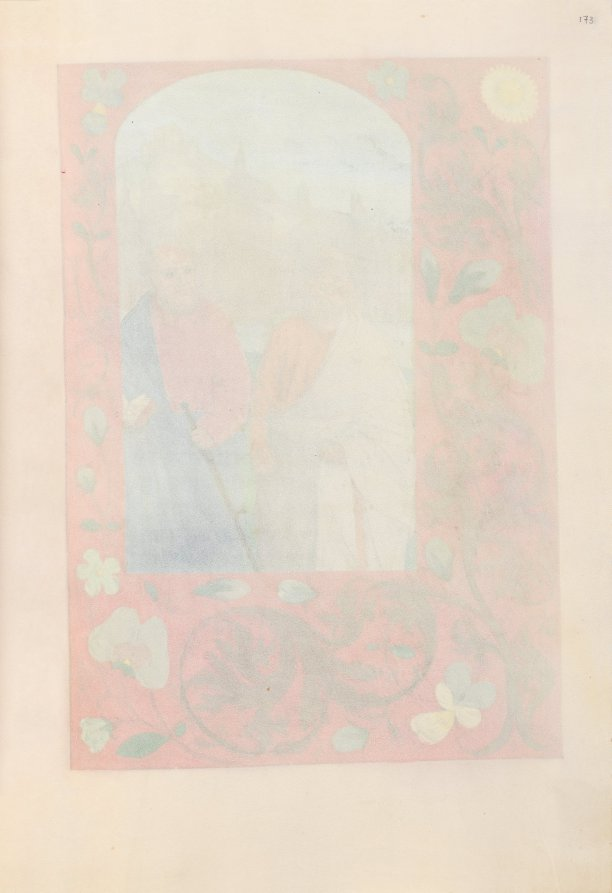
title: Hours of Queen Isabella the Catholic, Queen of Spain: Fol. 173r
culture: Flanders, Ghent and Bruges, late 15th century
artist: Master of the First Prayerbook of Maximillian (Flemish, c. 1444–1519)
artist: and Associates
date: c. 1500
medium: ink, tempera, and gold on vellum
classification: Bound Volume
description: This manuscript was illuminated by a circle of at least five highly organized manuscript painters active in the Flemish cities of Ghent and Bruges. The principal illuminator was Alexander Bening, who painted the majority of the book's miniatures. Manuscripts produced by this circle of artists are renowned for the decoration of their borders, which typically feature a rich variety of realistically-painted flowers, birds, and butterflies. This prayer book, called a book of hours, was intended not for a cleric, but for the private devotions of a lay person-in this case, Isabella the Catholic, Queen of Spain (1451-1504). Isabella's coat of arms embellishes the book's frontispiece. It is unlikely that the book was commissioned by the Queen herself; rather, she probably received it as a diplomatic gift from someone courting her patronage, perhaps Cardinal Francisco Jimenez de Cisneros. A Franciscan friar, Jimenez was dependent upon Isabella for his advancement, first to the post of Queen's confessor in 1492, and then to Archbishop of Toledo in 1495.